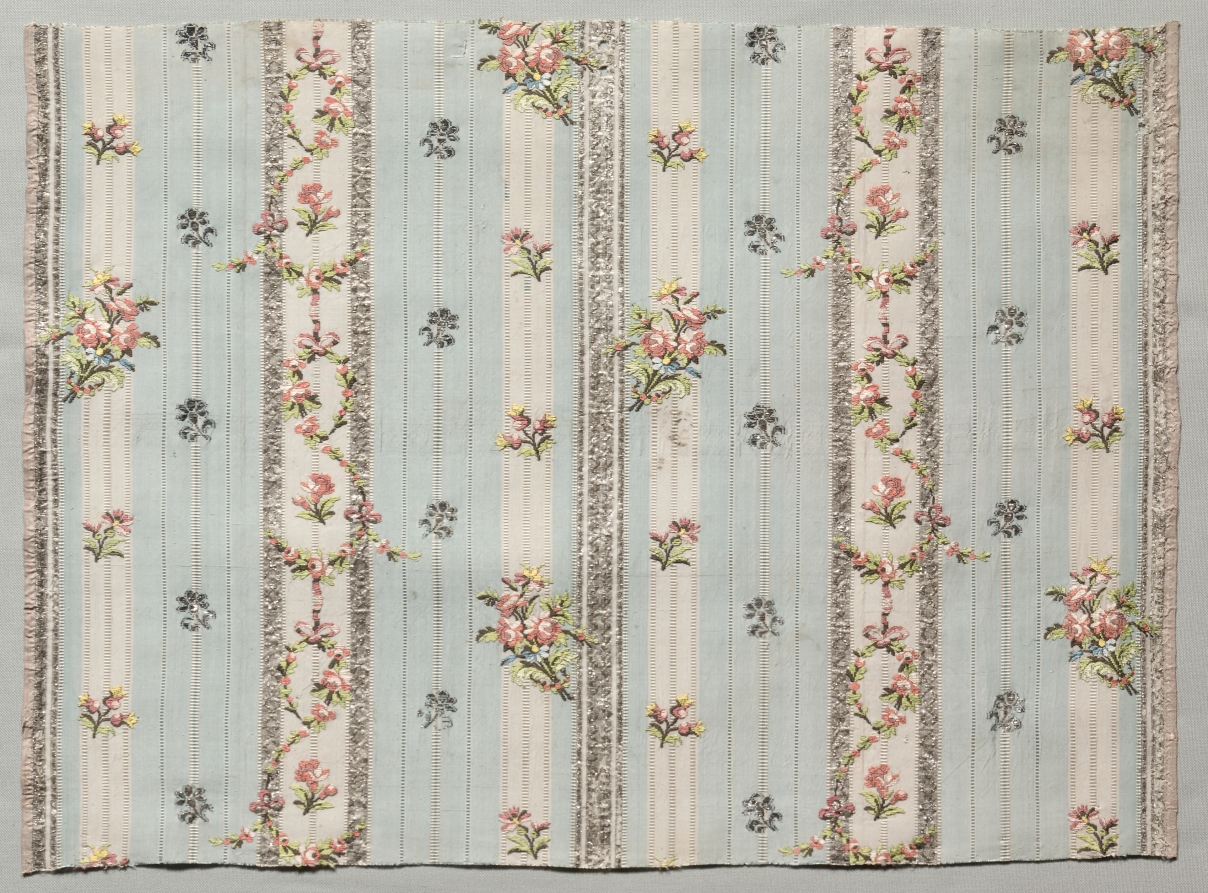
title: Taffeta Fragment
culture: France, 18th century, Period of Louis XVI (1774-1793)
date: 1774–1793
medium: taffeta, warp-patterned and brocaded; silk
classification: Textile